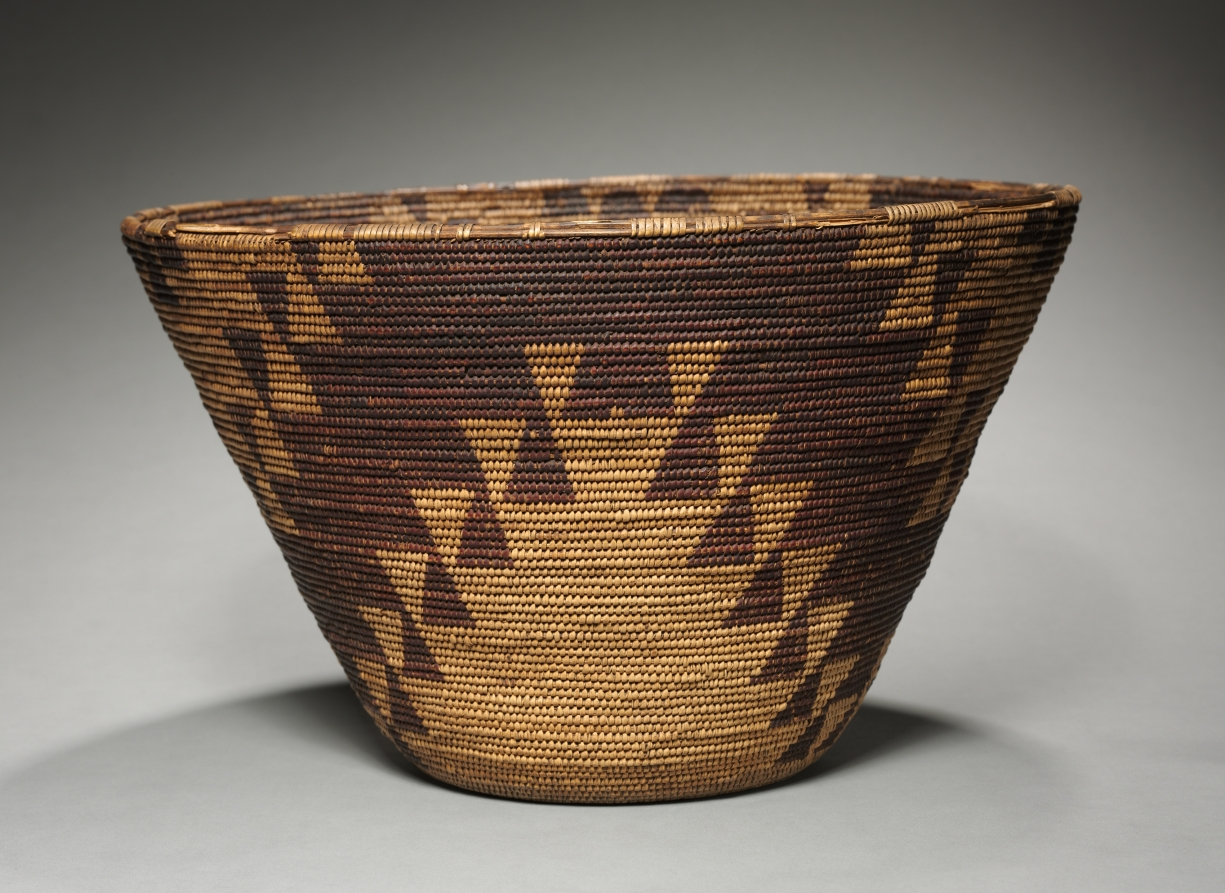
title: Cooking Bowl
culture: California, Maidu, Southern (Nisenan), Unassigned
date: Unassigned, before 1917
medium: redbud, coiled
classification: Basketry